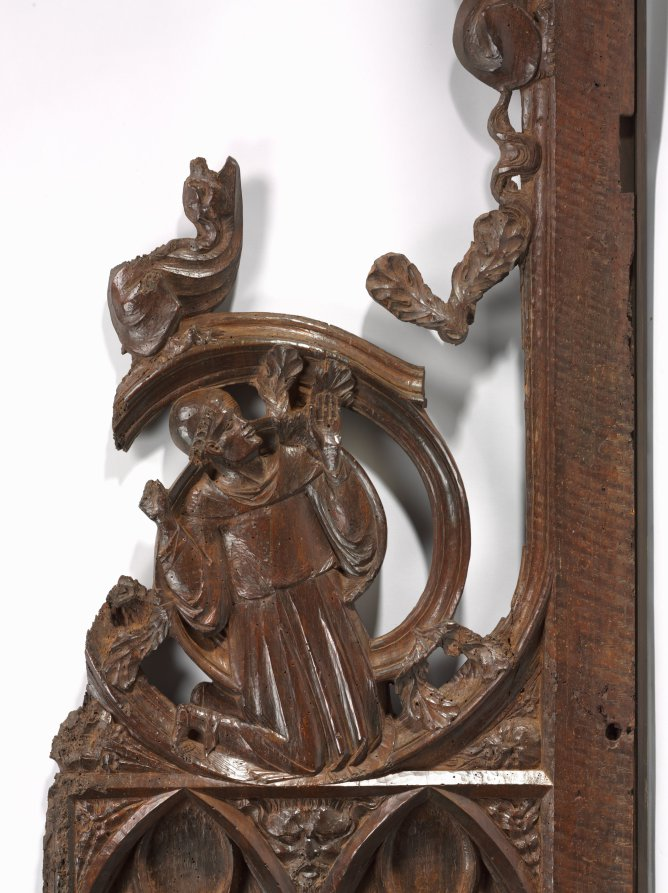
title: Panel from a Choir Stall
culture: Spain, Catalonia, Monastery of Pedralbes, 14th century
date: c. 1330–1340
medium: walnut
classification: Furniture and woodwork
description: The large panel shown here was probably the end panel of a stall that faced another across the choir of a Gothic church. The panel is carved with the figure of St. Francis of Assisi kneeling in prayer and receiving the stigmata. Two standing figures also appear on this panel: a nun at the left (perhaps St. Claire) and a female martyr at the right. Below is St. Michael and the dragon.